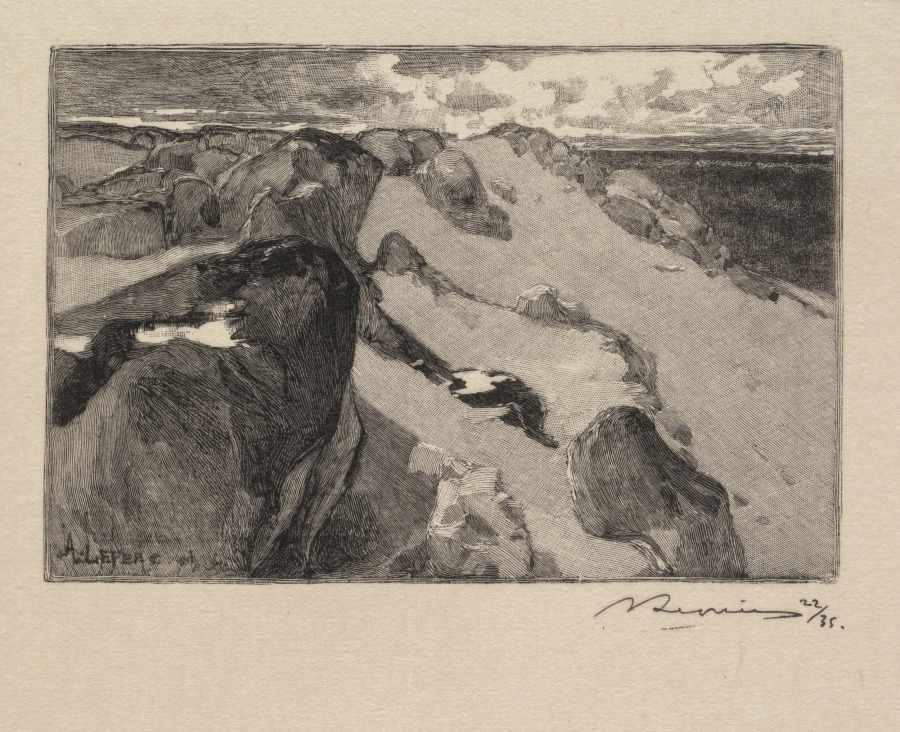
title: Arbonne, Le Gros Sablon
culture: France, 19th century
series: Fontainebleau Forest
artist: Auguste Louis Lepère (French, 1849–1918)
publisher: A. Desmoulins, Published in Revue Illustrée, 1887–90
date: 1890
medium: wood engraving from bound volume of 34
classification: Bound Volume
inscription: In block, lower left: A. LEPÈRE. Del. sc; below image, lower right, in black ink: ALepère 22/35; on window mat, lower right, in graphite:: Arbonne.-Le gros Sablon